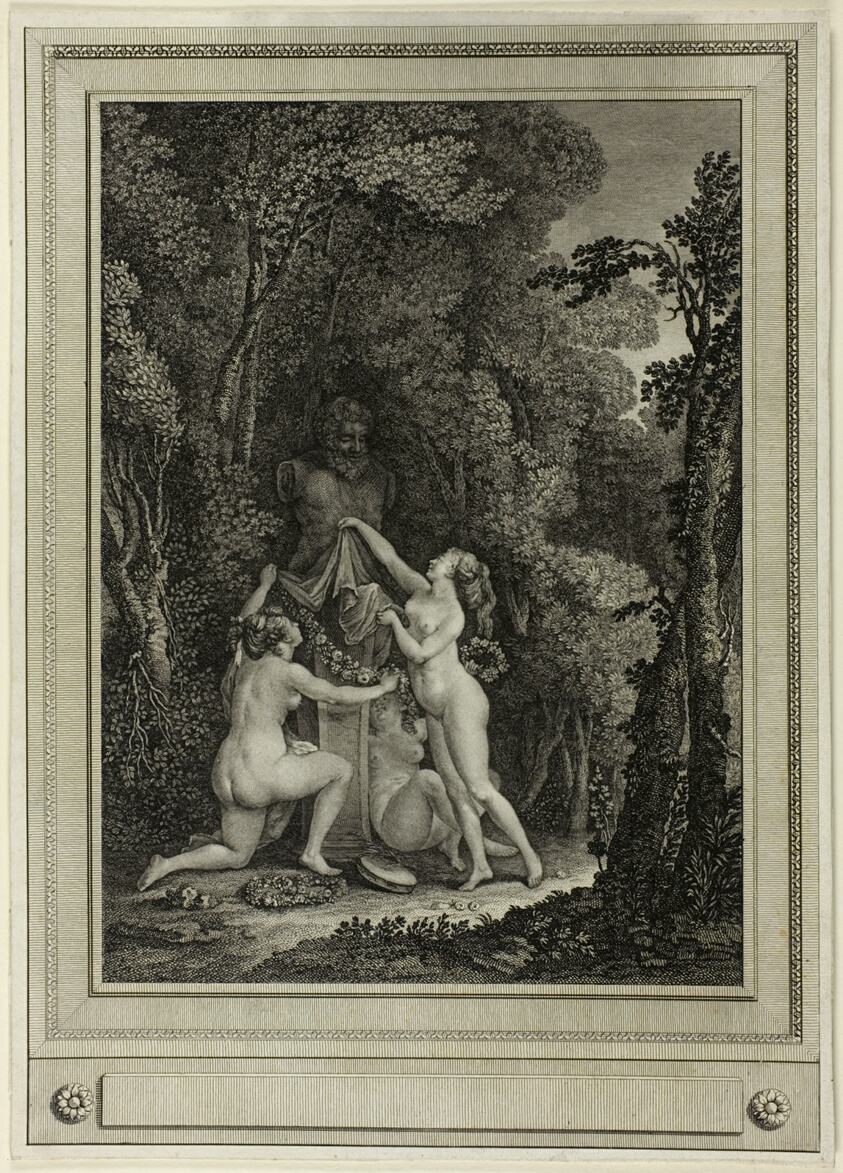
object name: Print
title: The Scrupulous Nymphs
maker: Gérard Vidal (French, 1742-1801); after Nicolas Lavreince (Swedish, 1737-1807)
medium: Etching, with roulette, stipple, and engraving, on cream paper, laid down on cream wove paper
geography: France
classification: etching; print; prints and drawing